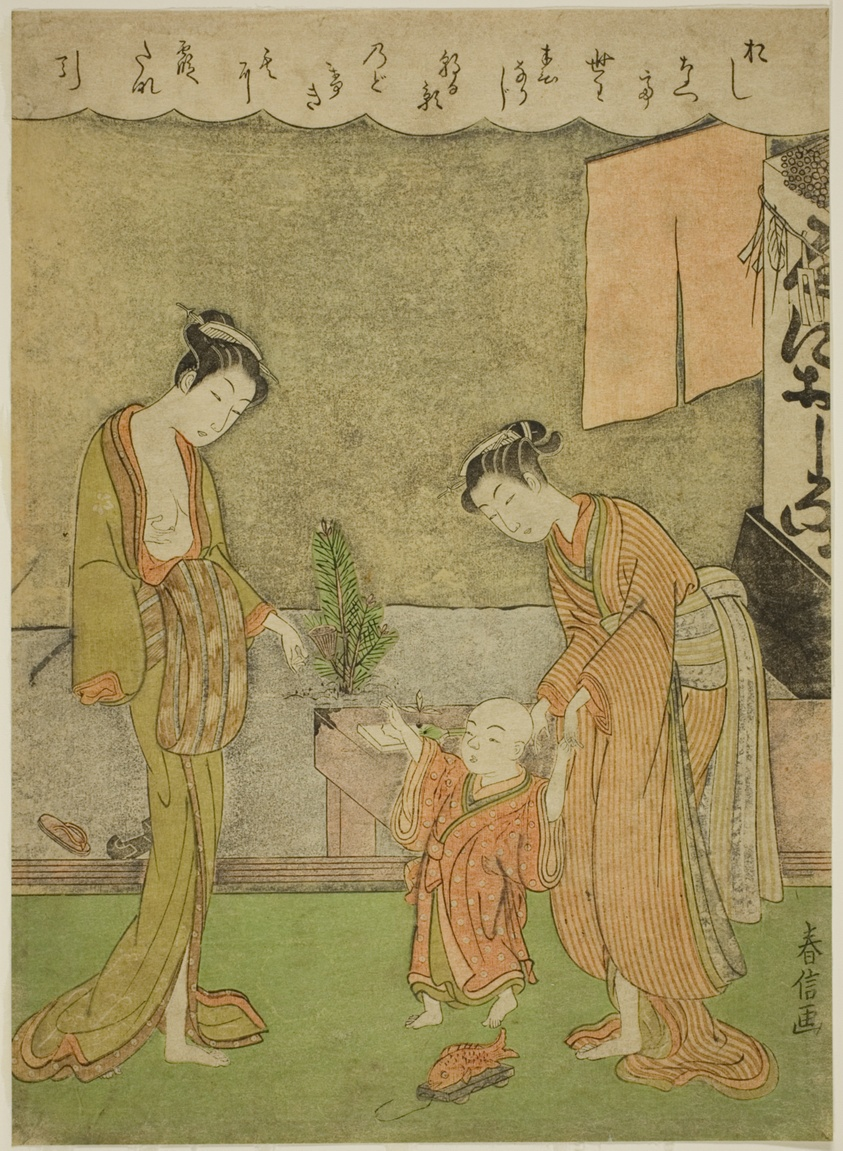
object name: Print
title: Two Women with Boy in Front of Powder Shop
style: Japanese (culture or style)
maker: Attributed to Shiba Kokan (Suzuki Harushige); Japanese, 1747–1818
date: c. 1770/71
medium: Color woodblock print; chuban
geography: Japan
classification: woodblock print; print; asian art